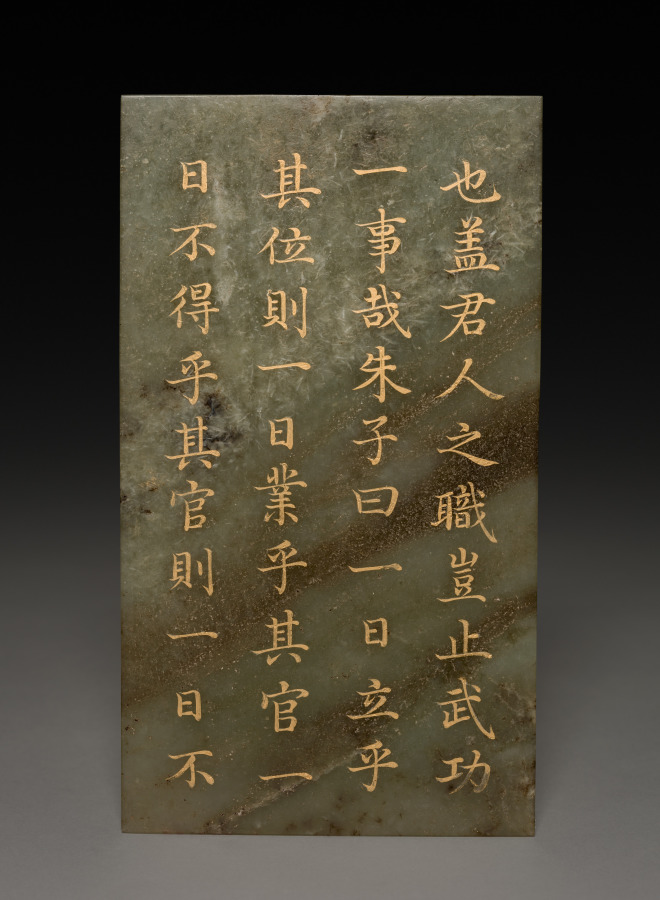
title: Tablet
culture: China, Qing dynasty (1644–1911), Qianlong reign (1736–95)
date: 1778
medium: jade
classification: Jade